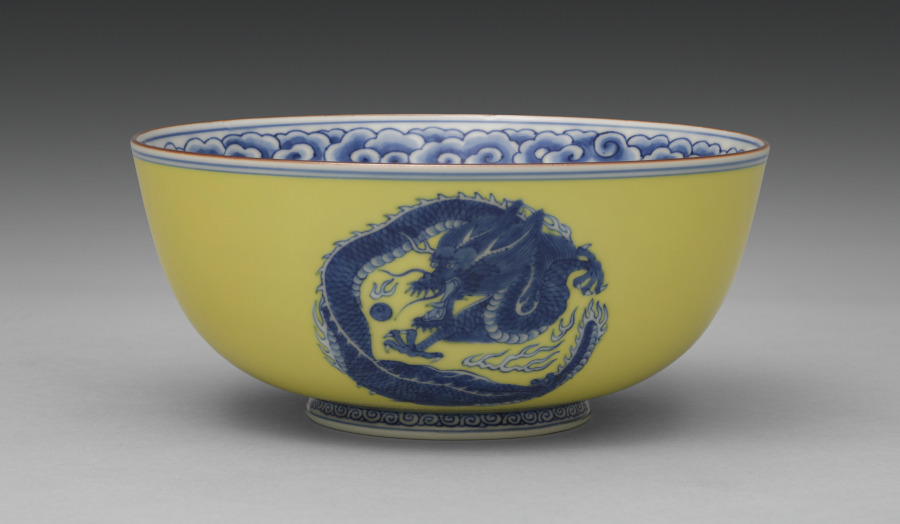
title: Bowl with Dragon Roundels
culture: Japan, Meiji period (1868–1912)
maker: Seifū Yohei III (Japanese, 1851–1914)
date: 1897–1914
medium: Porcelain with underglaze blue, iron oxide, and yellow glaze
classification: Ceramic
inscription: 清風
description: While this bowl has no box, it is attributed to Yohei III based in part on the style of the signature on its base. Below the rim, the bowl’s interior has a ring of clouds in underglaze blue. On the outside, bright yellow is combined with roundels of dragons capturing flaming jewels, painted under the glaze in blue, while the inside has a single dragon roundel in underglaze blue against a white ground. The work’s bold decorative scheme is more in keeping with what might be expected from the high-output studio of Miyagawa Kozan in Yokohama, whose products were designed for mass appeal. A similar bowl is in the collection of the Museum of Ceramic Art, Hyogo.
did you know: Seifū Yohei III was inspired by the Chinese mythical animals and motifs with magical symbolism—including clouds and fungi—that were common on porcelain objects made at Jingdezhen in China during the Ming dynasty (1368–1644) and then exported around the world.